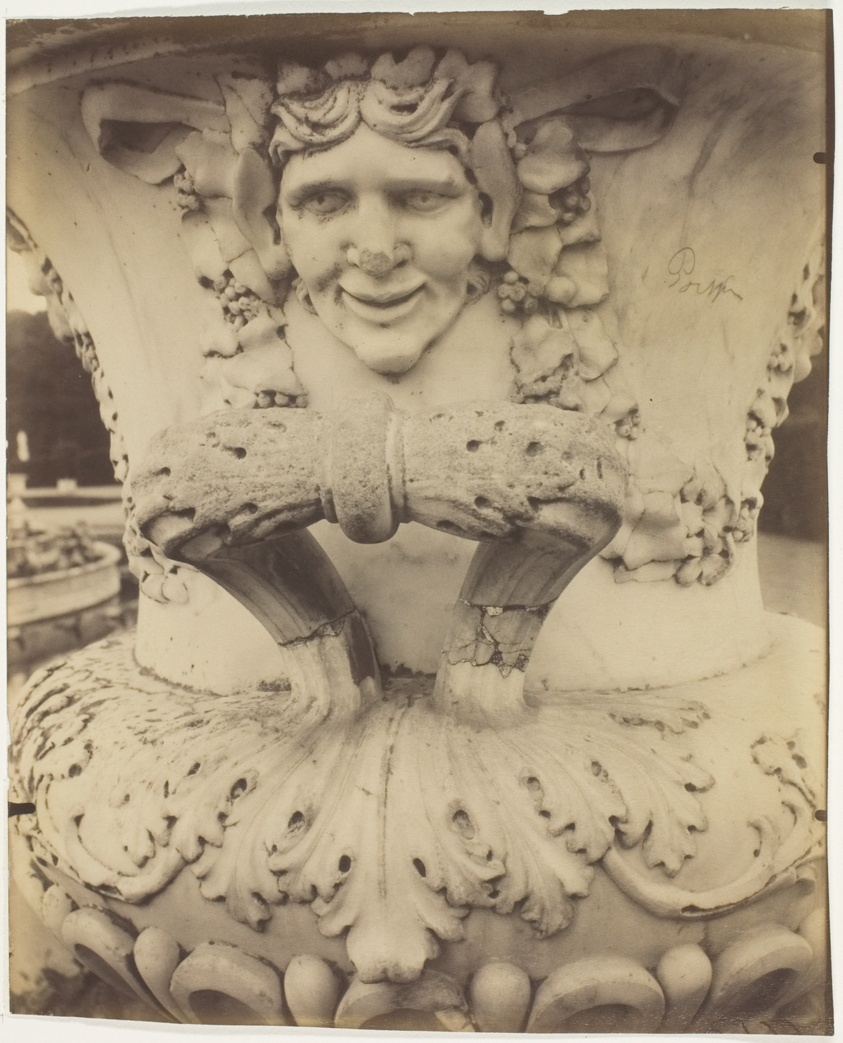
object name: Photograph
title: Versailles, Vase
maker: Jean-Eugène-Auguste Atget (French, 1857–1927)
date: 1906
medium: Albumen print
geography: France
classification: albumen silver print; photographic process; photography; photograph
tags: Collected by Hugh Edwards